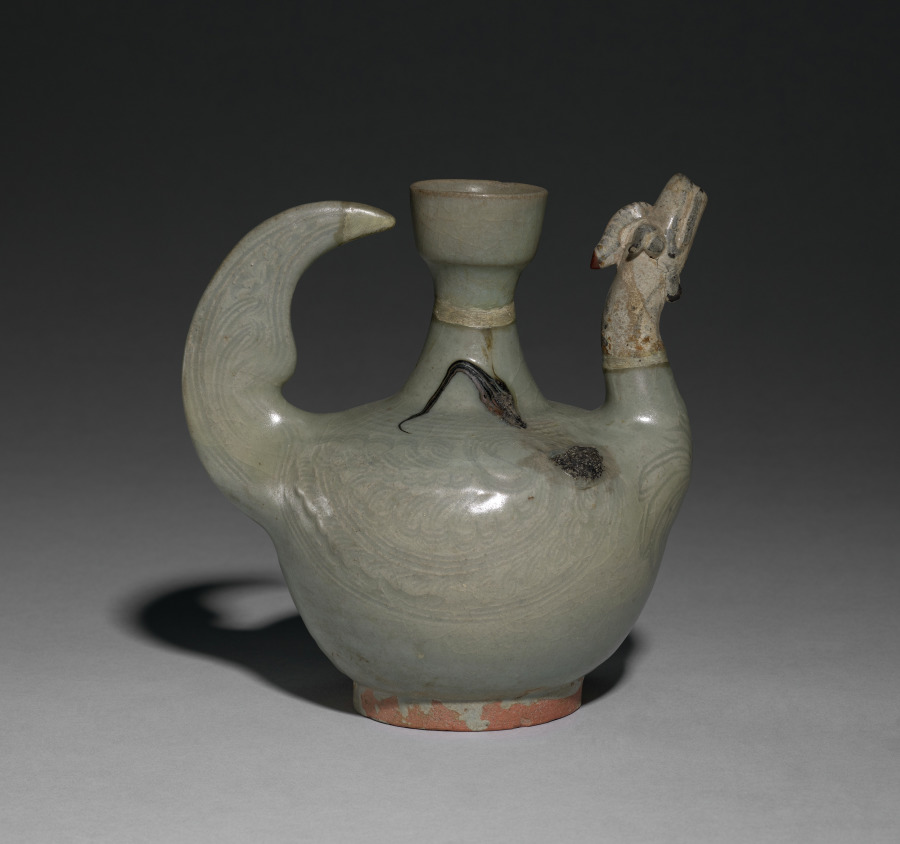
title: Pouring Vessel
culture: Siam, Sawankhalok ware, late 13th-14th Century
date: late 1200s-1300s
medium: stoneware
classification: Ceramic